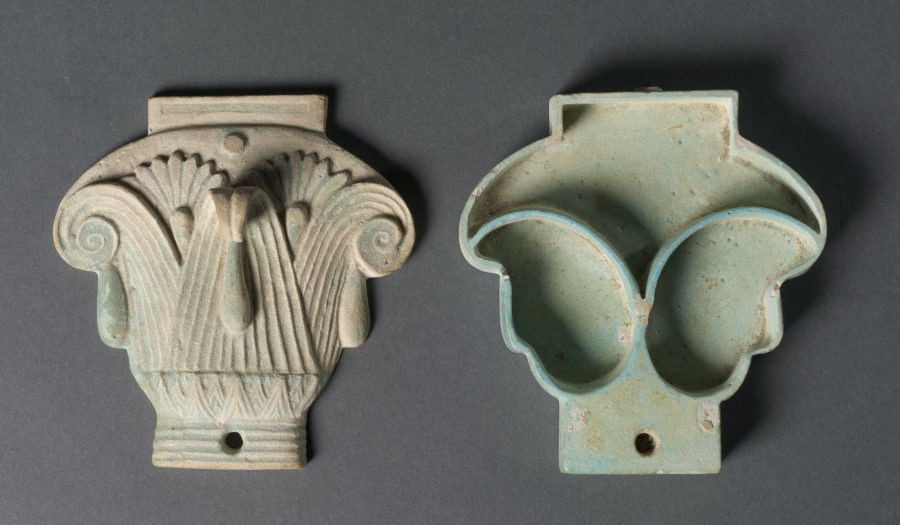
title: Box (Pyxis) in the Form of a Composite Capital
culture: Egypt, Greco-Roman period (332 BCE–395 CE), Ptolemaic dynasty (305–30 BCE)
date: 305–30 BCE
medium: pale robin's-egg blue faience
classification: Vessels